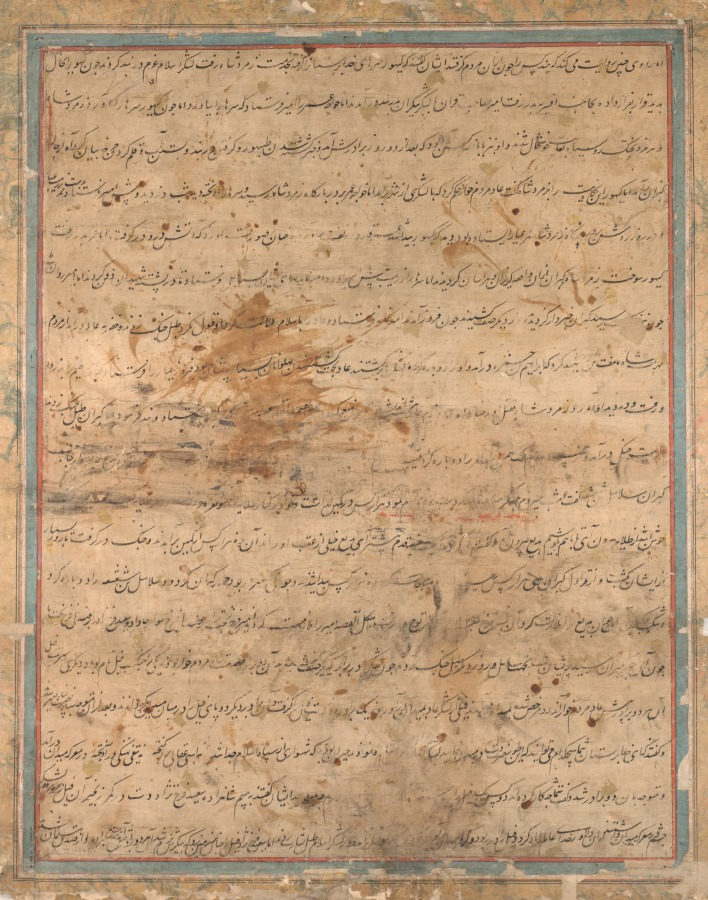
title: Alamshah cleaving asunder the chain of the wheel, from volume 11 of a Hamza-nama (Adventures of Hamza)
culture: Mughal India, court of Akbar (reigned 1556–1605)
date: c. 1560s–70s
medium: Gum tempera, ink, and gold on cotton and paper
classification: Painting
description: The hero, Alamshah the Greek, perches on a cliff above a rushing torrent of water. He has just slain the villain who raised the massive bronze plug on the dam in order to wash away the camp of Alamshah’s father, Hamza. The Hamza-nama recounts the adventures of an uncle of the Prophet Mohammed. It was the first major undertaking of the fledgling painting workshop created by Akbar. Originally in 14 volumes of 100 illustrations each, just a little more than 10 percent of the pages survive.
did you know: The title in the bottom margin is a continuation of the text on the previous page.